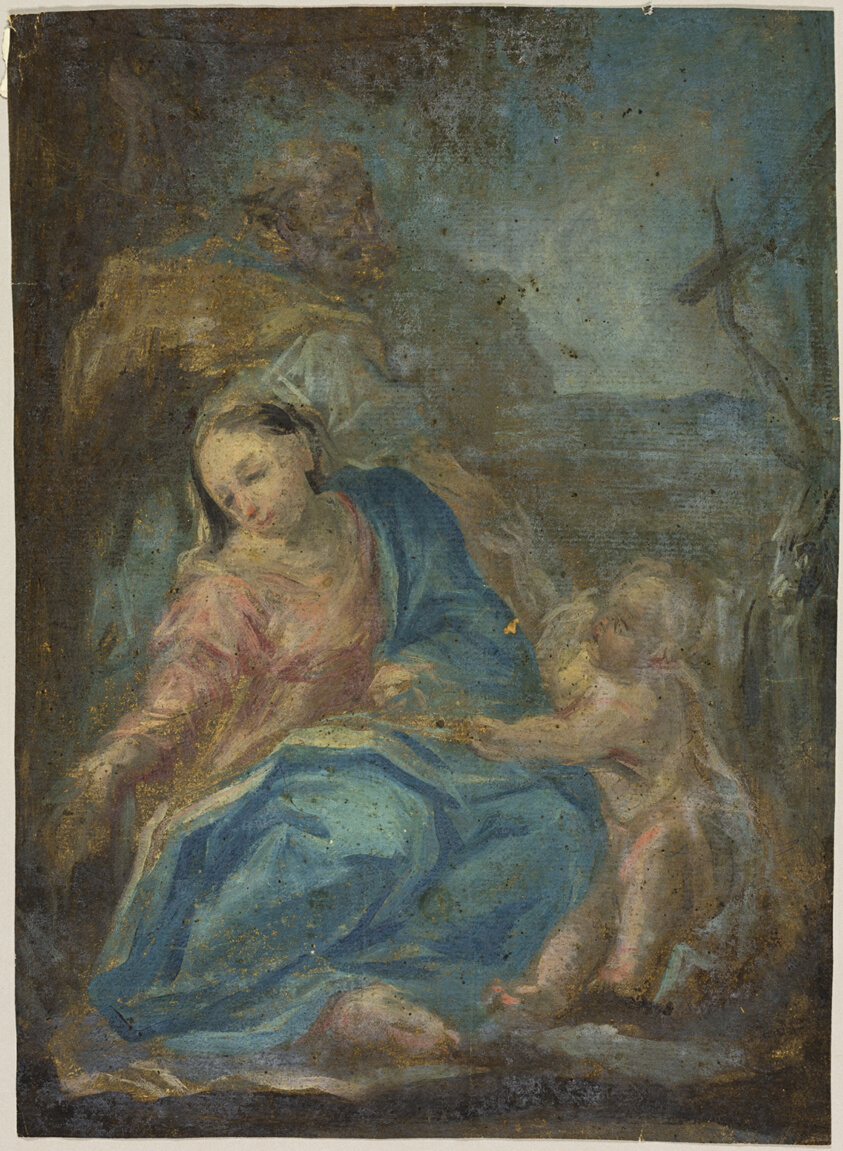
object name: Drawing and Watercolor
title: Rest on the Flight into Egypt (recto); Madonna of the Rosary (verso)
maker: After Federico Barocci; Italian, c. 1535-1612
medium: Oil paint (recto) and pen and black ink with off-set blue oil paint (verso) on tan laid paper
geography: Italy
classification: oil paintings (visual works); drawings (visual works); prints and drawing